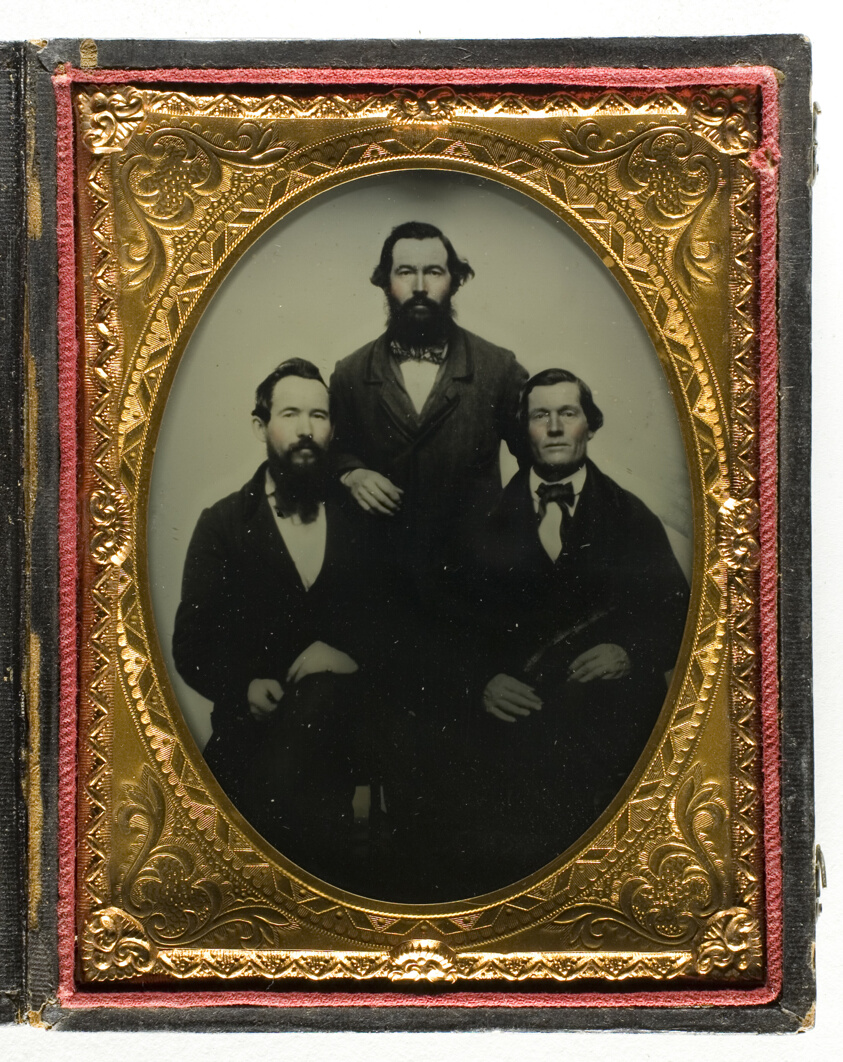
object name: Photograph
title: Untitled (Three Men)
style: 19th century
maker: Artist unknown; 19th century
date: 1839/99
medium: Ambrotype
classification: photography; ambrotype; photographic process; photograph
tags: portraits, portraits: male subject, photography, portraits: multiple subjects